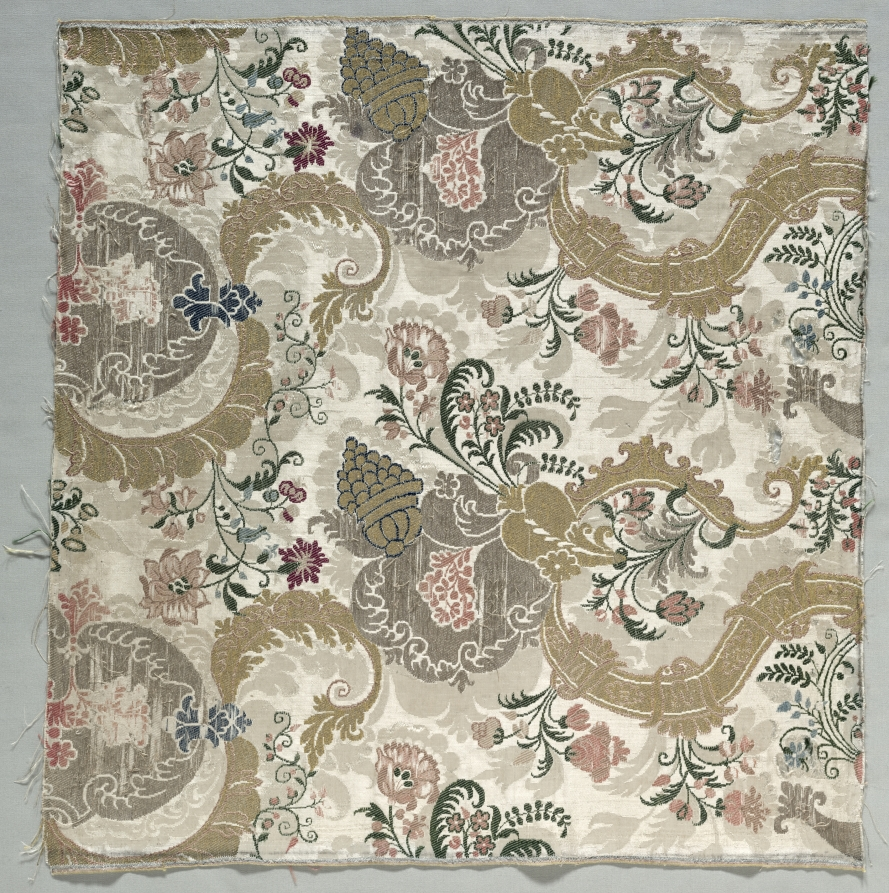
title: Length of Silk Textile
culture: Italy, 18th century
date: 1700s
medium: damask, brocaded; silk and metal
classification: Textile